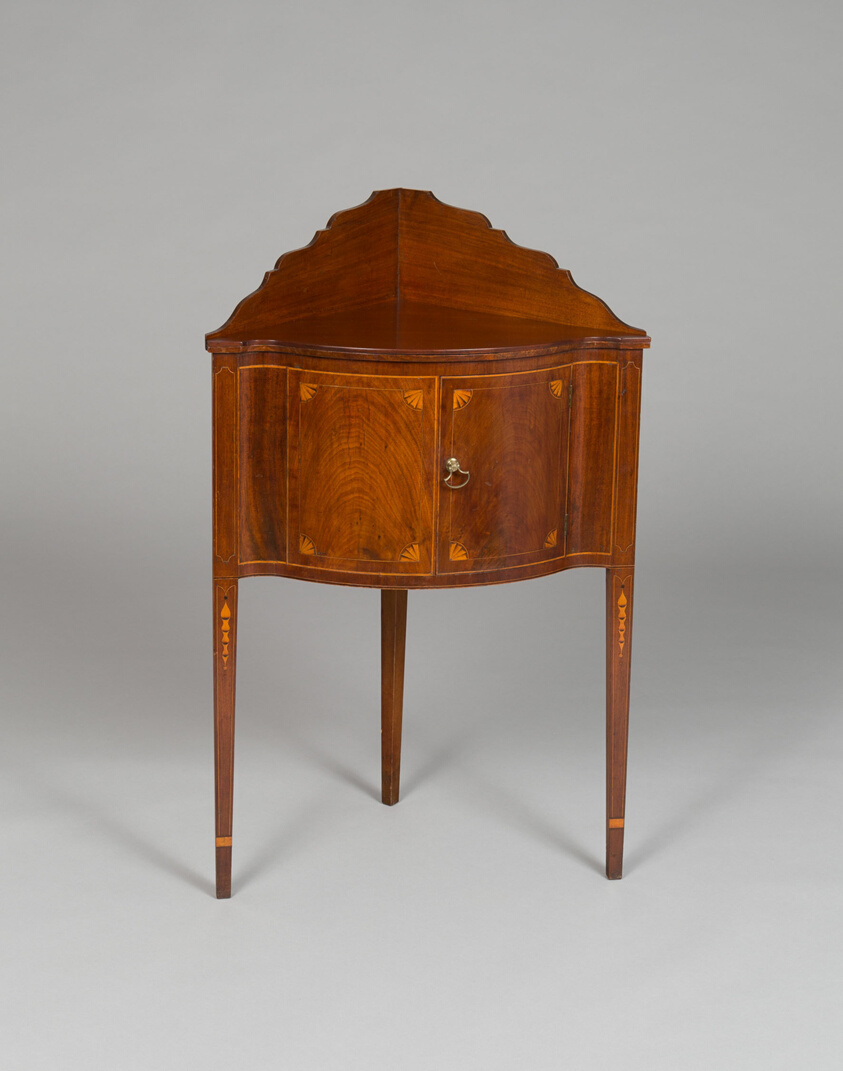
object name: Furniture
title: Corner Basin Stand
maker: Artist unknown (American, 18th–19th century); New York or possibly Connecticut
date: 1790–1800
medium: Mahogany with white pine and cherry, and light-colored inlays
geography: New York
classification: furniture accessory; american decorative arts; american arts; furniture